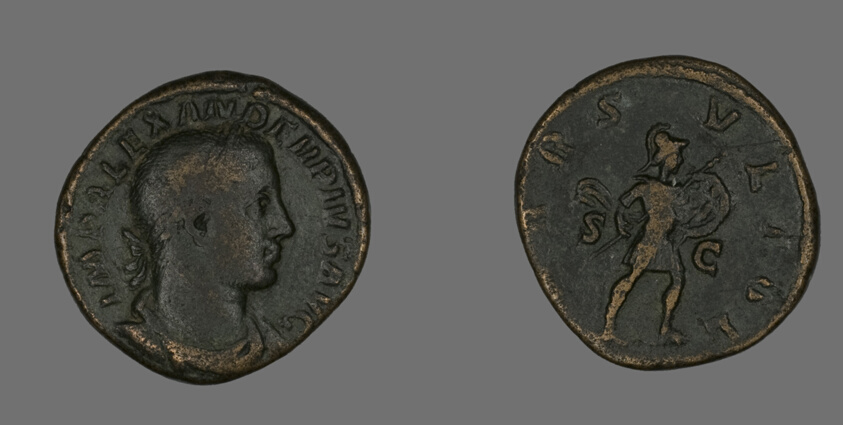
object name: Coin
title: Sestertius (Coin) Portraying Emperor Severus Alexander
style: roman (ancient, style or period)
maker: Roman, minted in Rome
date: 231-235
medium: Bronze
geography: Roman Empire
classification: coin; ancient art